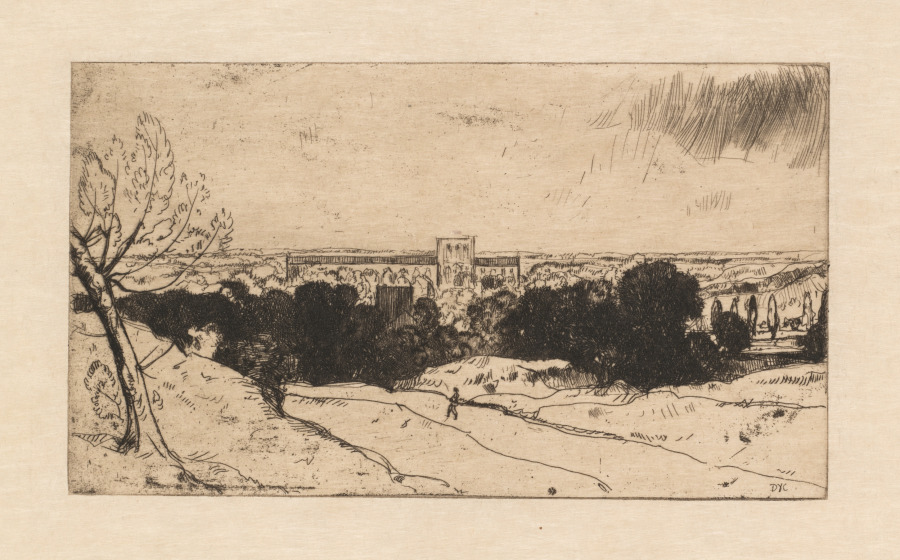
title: Distant View of Winchester and St. Croix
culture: England, 20th century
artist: David Young Cameron (British, 1865–1945)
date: 1902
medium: etching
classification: Print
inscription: Lower left, in graphite: Distant View of Winchester and St. Croix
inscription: lower right of mat, in graphite: From Webb C. Ball Galleries, Cleveland, Ohio.